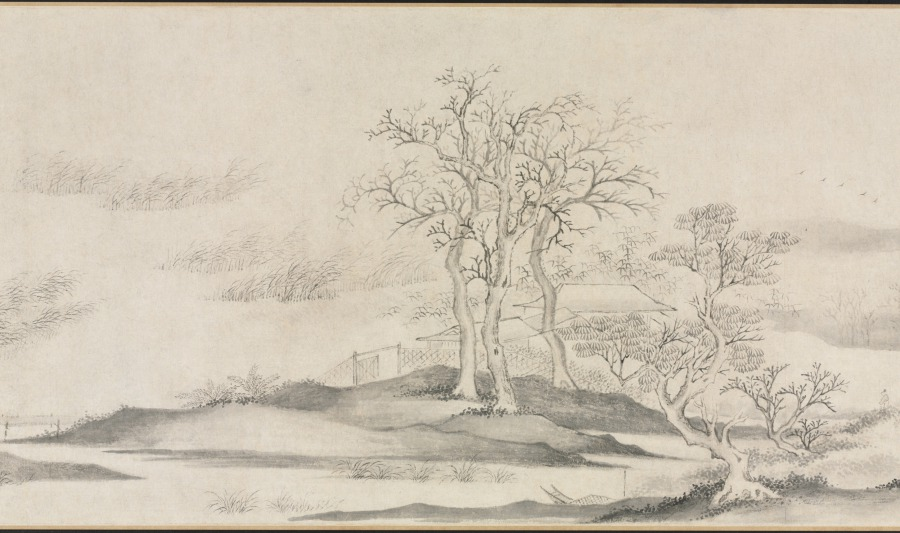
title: Water Village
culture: China, Ming dynasty (1368–1644)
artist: Wen Boren (Chinese, 1502–1575)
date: 1570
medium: handscroll; ink and light color on paper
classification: Painting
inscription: 隆慶庚午秋仿趙文敏筆. 五峰文伯仁 [印] 五峰山人; 文伯仁印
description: In the autumn of 1570, Wen Boren painted this seemingly unemotional scene of low-lying marshlands with a chain of rounded mountains in the background. A fishing boat is nestled on the shore near the village. Although paths and bridges traverse the landscape, only two people are visible in the stillness. From the restrained atmosphere of this landscape, one would never guess that Wen Boren was known as the “bad boy” of the Wu School for his explosive temper. As a younger man, he was even embroiled in a contentious lawsuit with his own uncle, Wen Zhengming (1470–1559), a master of Ming dynasty painting with whom he had trained. The ideal of the scholar-painter, or literati, was that an artist’s moral character is reflected in his paintings, so there was great incongruity between Wen Boren’s difficult personality and his restrained landscapes. A contemporary, Wang Shizhen, wrote this about him: "This gentleman is prone to behave odiously and screamed accusations at people. How is it possible for him to carry in his bosom such a wealth of scenic wonders?" Who knows what effort it took to subdue his fractious spirit to project an image of coolness and refined taste in his paintings?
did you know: A foreground tree has an eccentric twisting silhouette and pepper-dot "halo" of leaves.